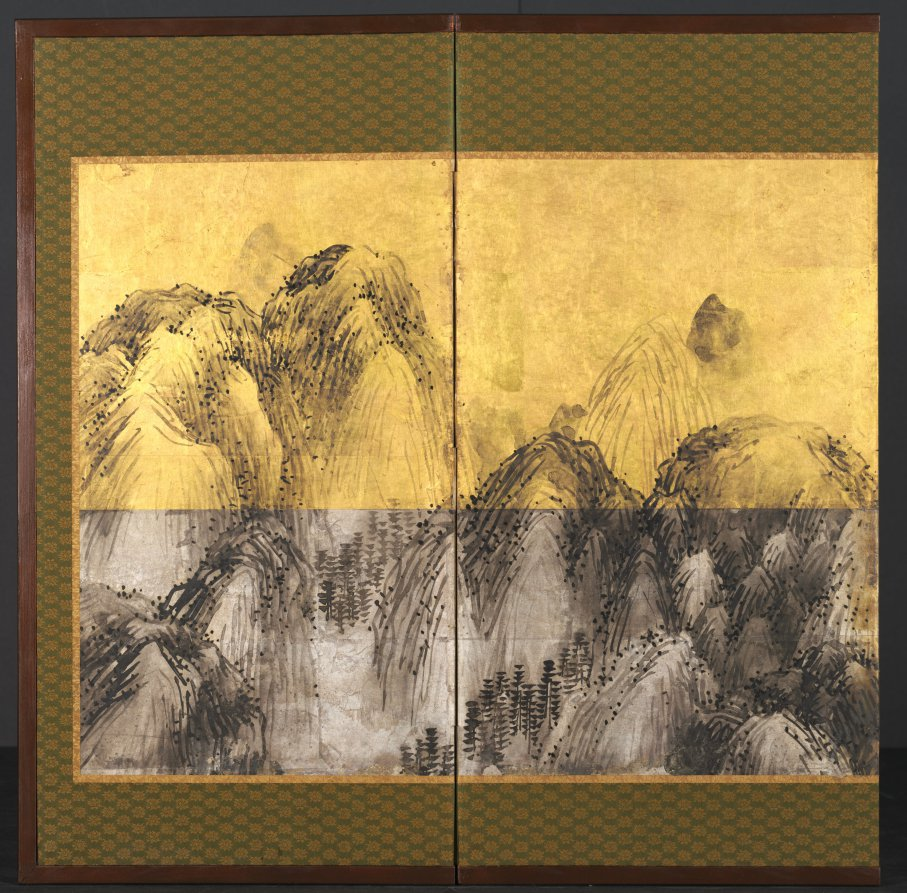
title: Seventy-Two Peaks Under the Blue Sky with Mount Furong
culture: Japan, Edo period (1615–1868)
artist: Matsumura Goshun (Japanese, 1752–1811)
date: 1785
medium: Eight-panel folding screen; ink with gold and silver foil on paper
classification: Painting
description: The low height of this folding screen suggests its use as a partition in a small tearoom. An inscription identifies the scene as the 72-peak Heng mountain range in Hunan, China, associated with Buddhist and Daoist traditions and celebrated in poetry. Special mention in the inscription is made of Mount Furong, one of the peaks in the range. Matsumura Goshun may have drawn inspiration from his teacher, Yosa Buson (与謝蕪村) (1716–1783), whose final work depicted the same mountain range.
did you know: By painting on silver and gold foil, Matsumura Goshun created an alluring surface and deep space in this surprisingly spare vista.